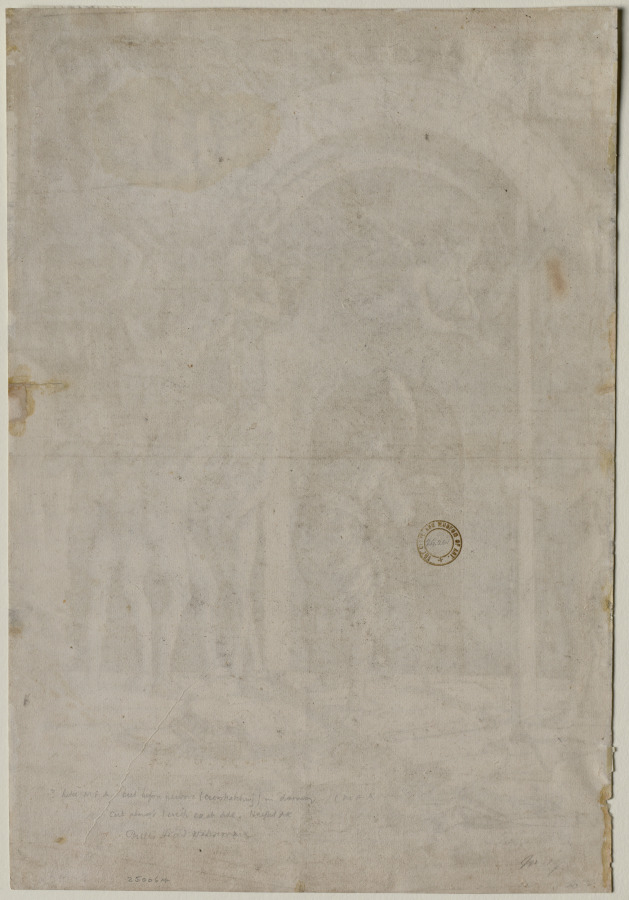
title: Descent into Limbo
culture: Italy, 15th century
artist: Giovanni Antonio da Brescia (Italian)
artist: after Andrea Mantegna (Italian, about 1431–1506)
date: c. 1490–1500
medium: engraving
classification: Print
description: This subject, also known as the Harrowing of Hell, recounts Christ’s descent into limbo, the first circle of hell, to liberate the souls of Old Testament saints. The church taught that those who lived and died in an era without the Christian sacraments were relegated to a lower place until Christ could come redeem them. Here Christ, holding the banner of the Resurrection, enters through a doorway. Broken from its hinges, the door has fallen to the ground over which Christ triumphantly walks. A group of figures await their redemption, including Adam and Eve to the right. Above, a group of demons emerge from the cavern, sounding trumpets to announce Christ’s arrival.